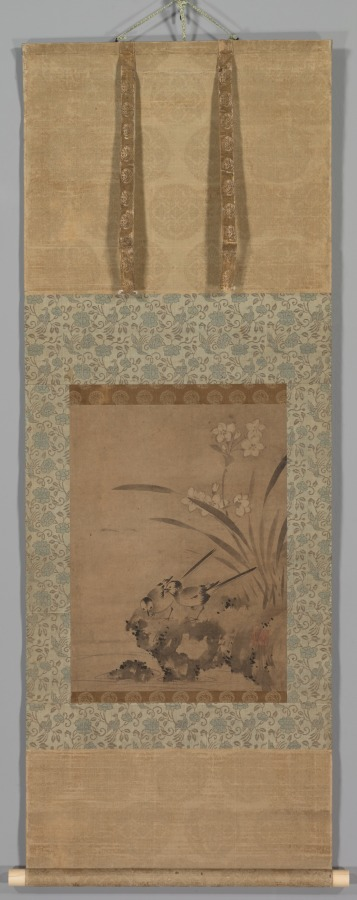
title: Wagtails and Narcissus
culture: Japan, Muromachi period (1392–1573)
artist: Eison (Japanese)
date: mid-1500s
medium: hanging scroll; ink on paper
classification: Painting